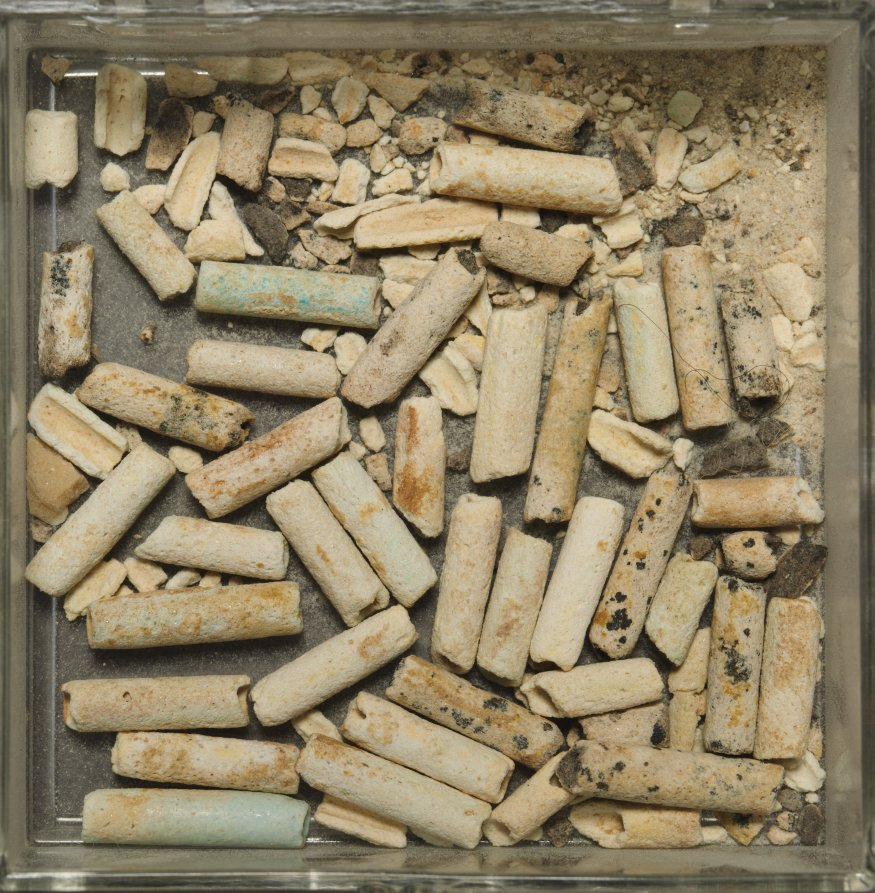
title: Necklace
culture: Egypt, Middle Kingdom (2040–1648 BCE)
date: 2040–1648 BCE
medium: faience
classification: Jewelry